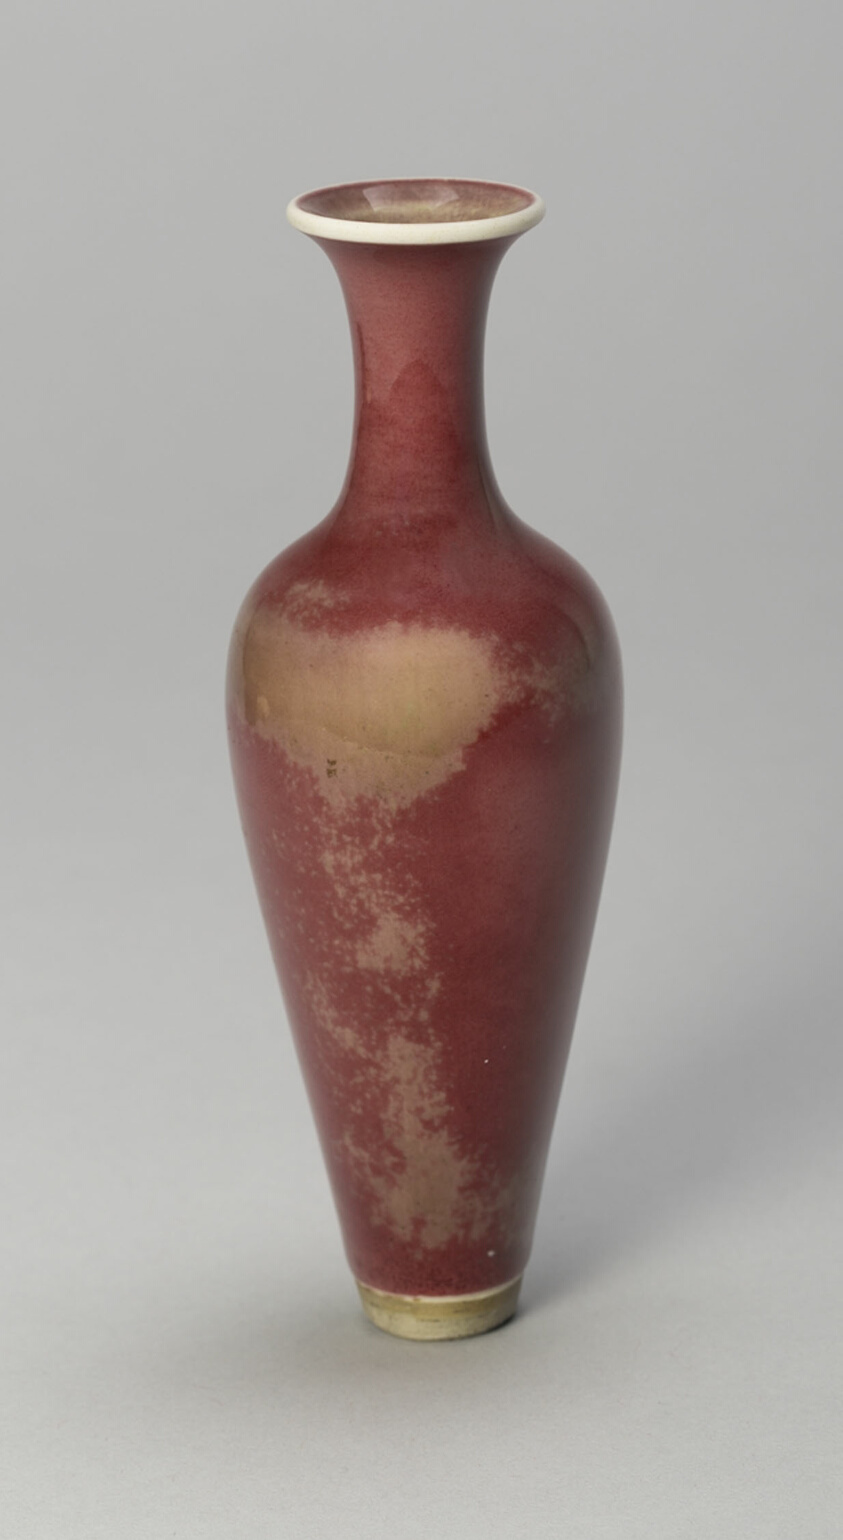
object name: Ceramics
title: Willow-Leaf Bottle Vase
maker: China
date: Qing dynasty (1644–1911), Kangxi reign mark and period (1662–1722)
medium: Porcelain with copper-red (peachbloom) glaze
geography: China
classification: porcelain; asian art; ceramics